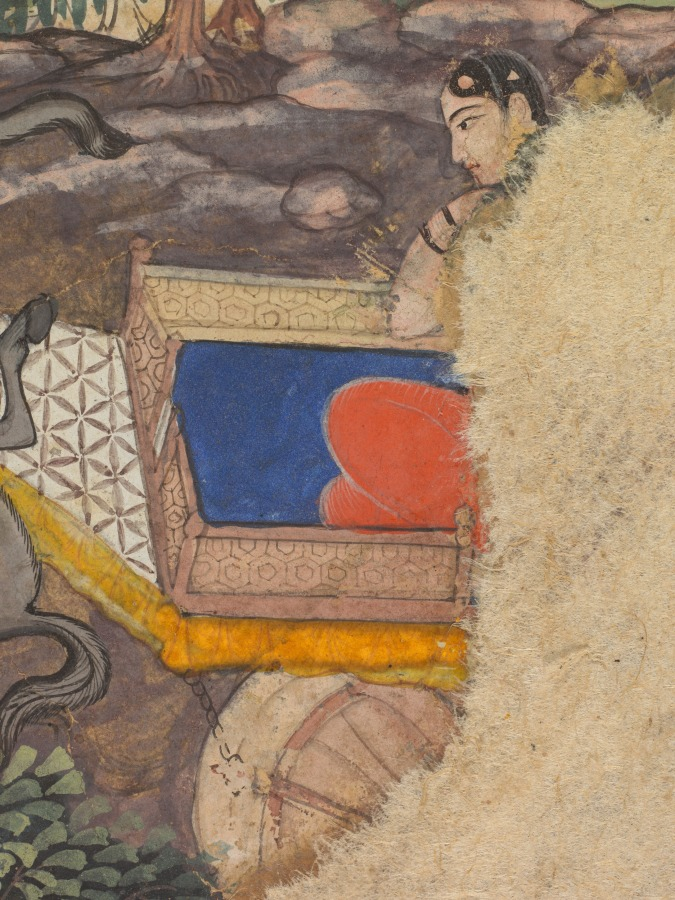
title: Battle of Ravana and Jatayu, from Chapters 50 and 51 of the Aranya Kanda (Book of the Forest) of Valmiki's Ramayana (Rama’s Journey); folio from the "Burnt" Ramayana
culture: Central India, Bundelkhand Region, Madhya Pradesh, Rajput Kingdom of Datia, Court of Raja Bir Singh Deo (reigned 1605–27)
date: c. 1605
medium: Gum tempera and ink on paper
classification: Painting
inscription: [[verso, text of Battle of Ravana and Jatayu: Sanskrit text in devanagari script]]: Now [an extraordinary fight ensued] there between the vulture [Jatayu] and the demon [Ravana], quite violent [as if] between two great, winged mountains. With sharp [arrows, broad-headed and made of iron] and spears too, [that immensely powerful demon] forcefully showered [the King of Vultures]. In the course of battle that vulture, Jatayu, Lord of Birds, [confronted] that mass of arrows [the weapons of Ravana], and then he, [that vulture], like a mountain shaken about [fell backward], and with his talons dragged him [Ravana] down, overcome by anger. And that immensely powerful Lord of Birds instantly made his [Ravana’s] limbs bloodied with his sharply taloned feet. Then, Ravana [in a rage] pierced the King of Vultures in battle with [three direct arrows], frightful and swift. And after, he took up his other dreaded arrows on reserve, [with their arrowheads straight]. Each one resembled Death’s staff, [crushing insolence in] enemies. That immensely powerful, mighty demon pierced the [the bird’s body] with [perfectly sharp], golden-feathered arrows . . . . Without even taking those arrows into account, that enraged bird launched himself at Ravana. [Flying upward and then rushing down], raising his wings overhead, he battered [Ravana] with those feathered limbs. [Then, that Lord of Birds, energy blazing, splintered] with his claws [Ravana’s] bow and arrows, adorned with gems and pearls. And that Lord of Birds [splintered] also those very arrows shot [by Ravana]. Then, that immensely powerful [Indra of Birds] [over and over again, pecked at Ravana’s divine crown] made of gold and glittering with every jewel, and [being full of rage, hurled] it through the sky. Like the sun’s halo, it glistened as it sank. [That bird] struck down the asses, with their golden chest armor and devilish [pishacha] faces, and yanking them about, [instantly deprived them of breath]. He [smashed] the fearsomely huge chariot, which flies upon a wish, ornamented from wheel to pole, [each part arrayed in gold] and jewels. Tearing the charioteer from the chariot, [that Lord of Birds], with talons [that seemed like elephant goads, quickly shred him], then tossed him away. Ravana, his bow broken, chariot done with, [his asses killed, his charioteer slain,] fell to the ground, holding Vaidehi [in the crook of his arm]. Seeing Ravana fallen to the ground, his chariot smashed, all the other creatures celebrated the King of Vultures, crying—“Well done, well done!” [And the gods and sages] were amazed when they saw [Ravana, the destroyer of pride among enemy armies,] who was never defeated [by the gods and demons] on the front lines, defeated now [by the best of birds]. Then the denizens of the heavens praised that best of birds—“O excellent one, you have accomplished a difficult task!” The venerable King of Birds, who was extolled, became resolute and once again endured battle.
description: The vulture Jatayu, Lord of the Birds, his beak agape, loses feathers and dark red blood in his desperate fight to save Sita from her kidnapper, the ten-headed Ravana. Since this painting was damaged by fire in India decades ago, Sita is barely visible now at the bottom right corner, in Ravana’s donkey-led chariot. Her expression is pensive, as she awaits her fate. In adherence to the Ramayana text written on the back of the painting, the donkeys were the first victims in the battle that will claim Jatayu’s life.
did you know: This page is from a series known as the “Burnt Ramayana,” since it was damaged by fire.